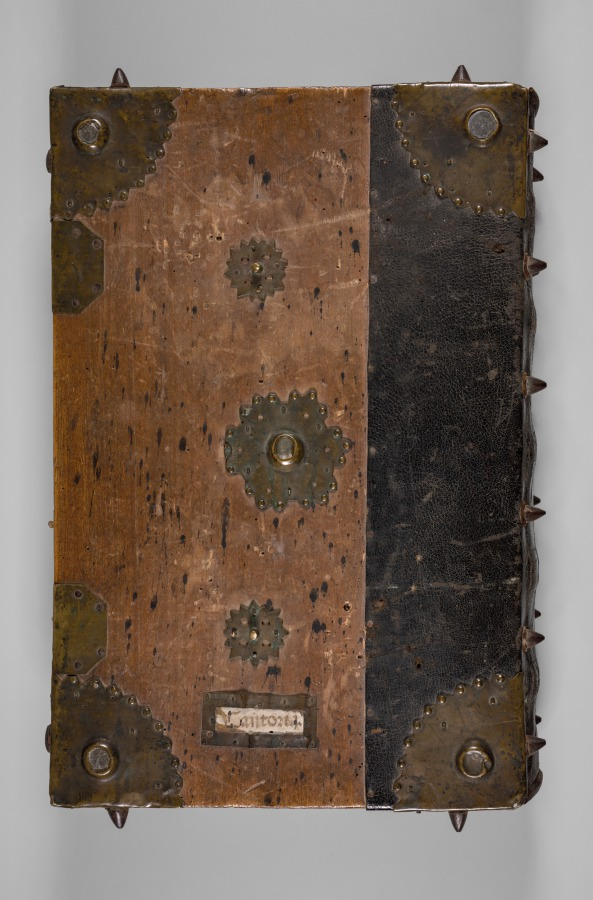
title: Gradual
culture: Italy, Verona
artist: circle of Girolamo dai Libri (Italian, 1474–1555)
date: c. 1520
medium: Ink, tempera, and gold on vellum; wood binding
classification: Manuscript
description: The liturgical book known simply as a “gradual” was the principal choir book used during the Mass. They were produced in multiple volumes, sometimes as many as 12, in order to cover the entire liturgical year. Every church required a set of graduals in addition to other liturgical books such as missals, antiphonaries, and gospel lectionaries. This volume appears to be the lone survivor from a larger set. Its illuminations were painted by an illuminator working in the circle of the much-esteemed and highly imitated painter Girolamo dai Libri of Verona, who was a prolific painter of altarpieces as well as illuminations for books.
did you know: Girolamo dai Libri was only 16 years old when he painted his first altarpiece.